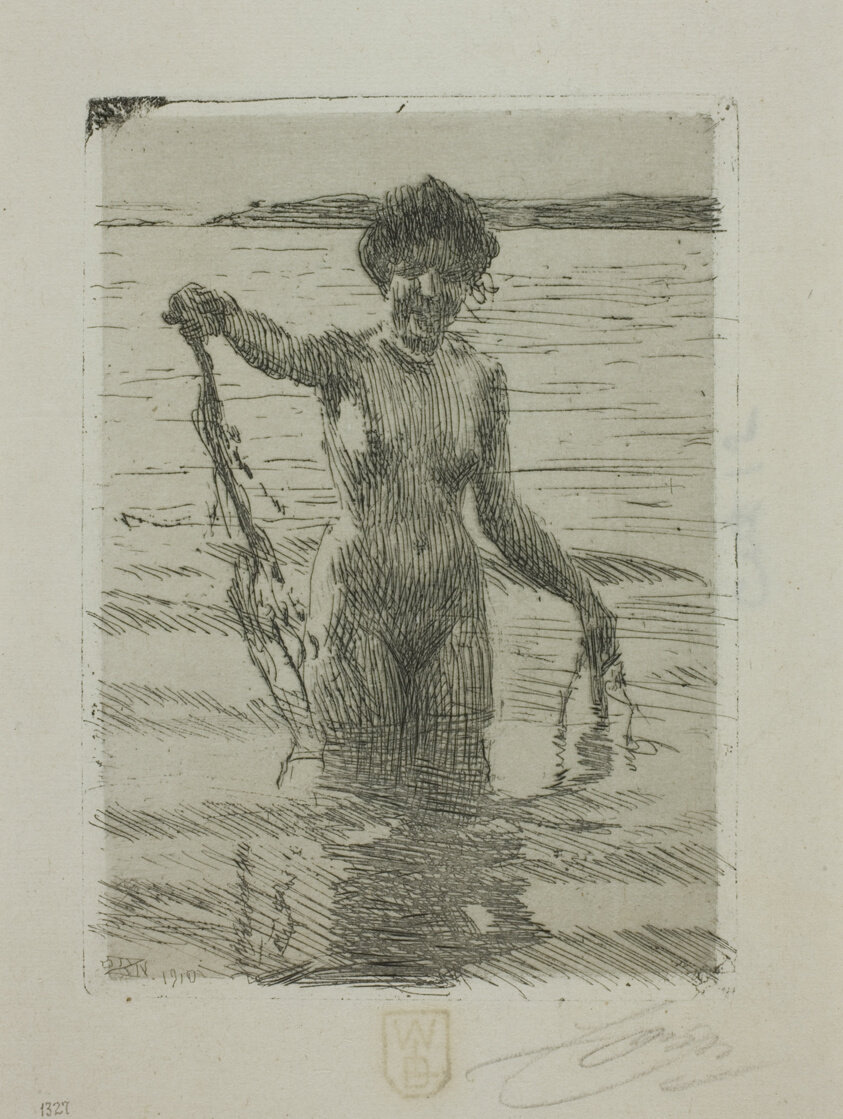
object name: Print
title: Seaweed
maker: Anders Zorn (Swedish, 1860-1920)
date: 1910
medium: Etching on paper, laid down on card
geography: Sweden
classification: etching; print; prints and drawing